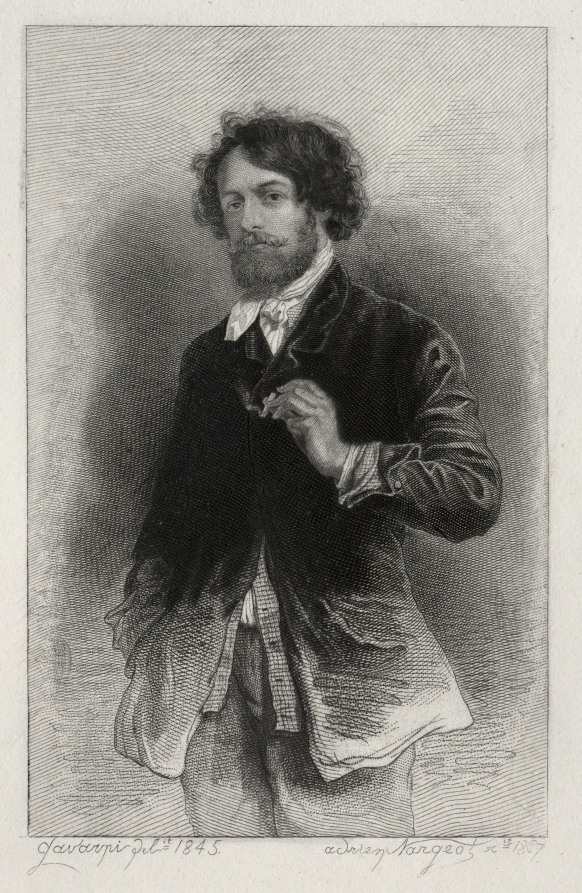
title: Gavarni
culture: France, 19th century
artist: Adrien Nargeot (French, 1837-)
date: 1867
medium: etching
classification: Print